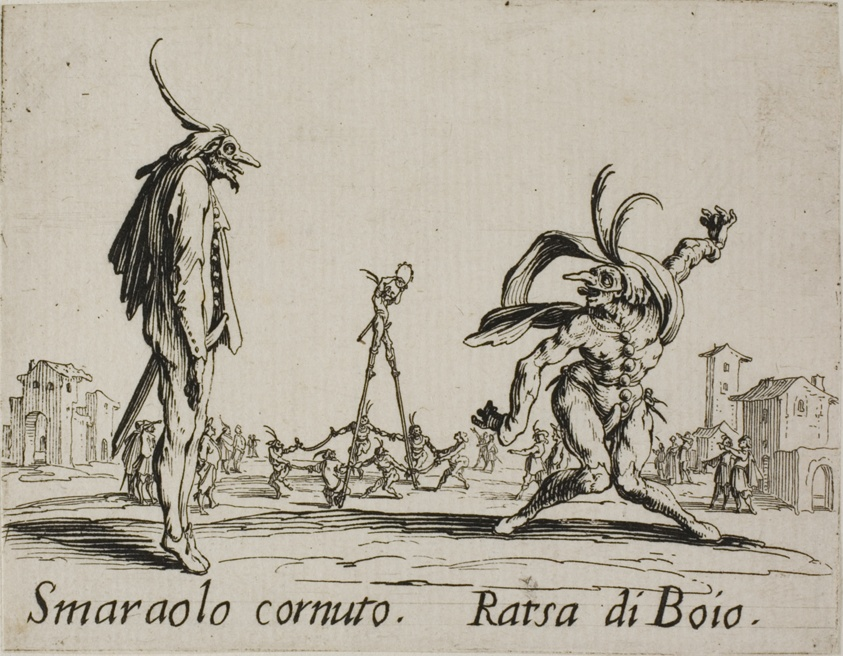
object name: Print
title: Smaraolo cornuto - Ratsa di Boio, plate 4 from Balli di Sfessania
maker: Jacques Callot (French, 1592-1635)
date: c. 1622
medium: Etching and engraving on paper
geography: France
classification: etching; print; prints and drawing